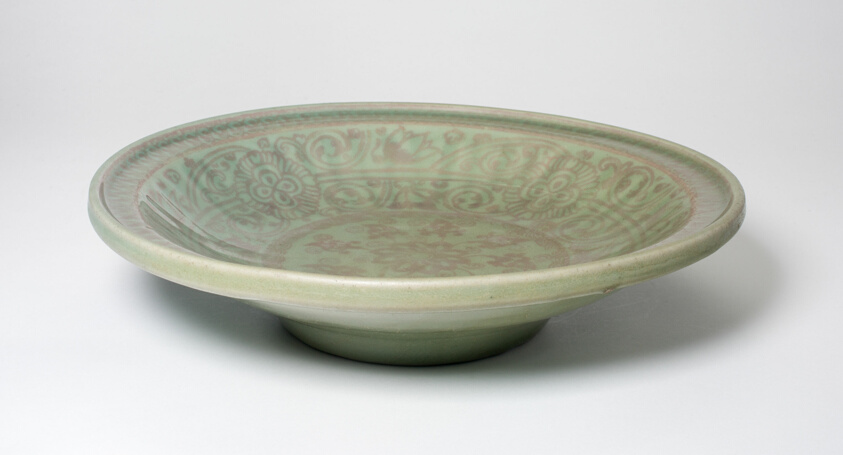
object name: Vessel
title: Ribbed Dish with Floral Scrolls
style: Chinese (culture or style)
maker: China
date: Ming dynasty (1368–1644), 14th/15th century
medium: Celadon-glazed porcelain with underglaze copper red decoration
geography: China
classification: dish (vessel); porcelain; asian art; ceramics; vessel